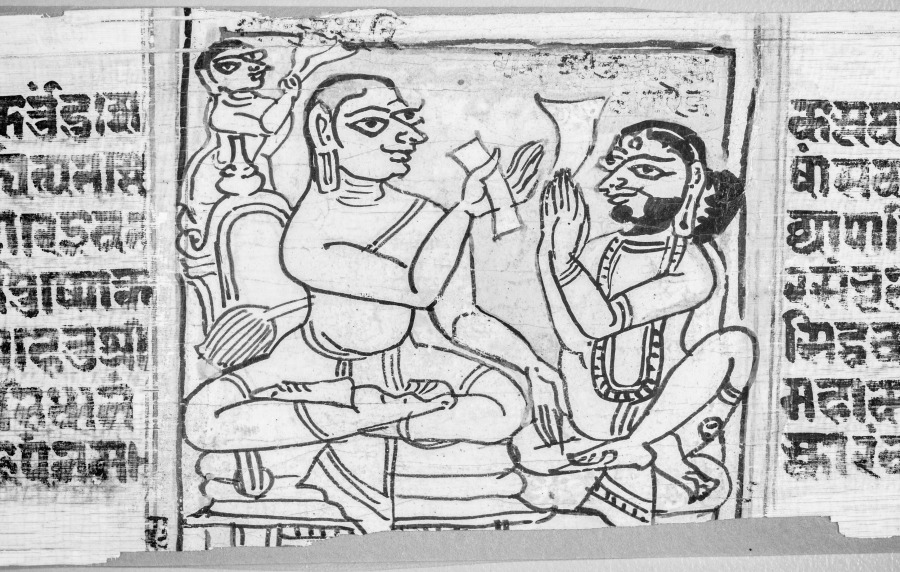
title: King Kumarapala Pays Reverence to Hemachandra: Folio 2 (recto), from a Great Poem about Twos (Dvyashraya Mahakavya) of Hemachandra with Commentary by Abhayatilaka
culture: Western India, Gujarat, possibly Patan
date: 1428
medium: Gum tempera and ink on palm leaf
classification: Painting